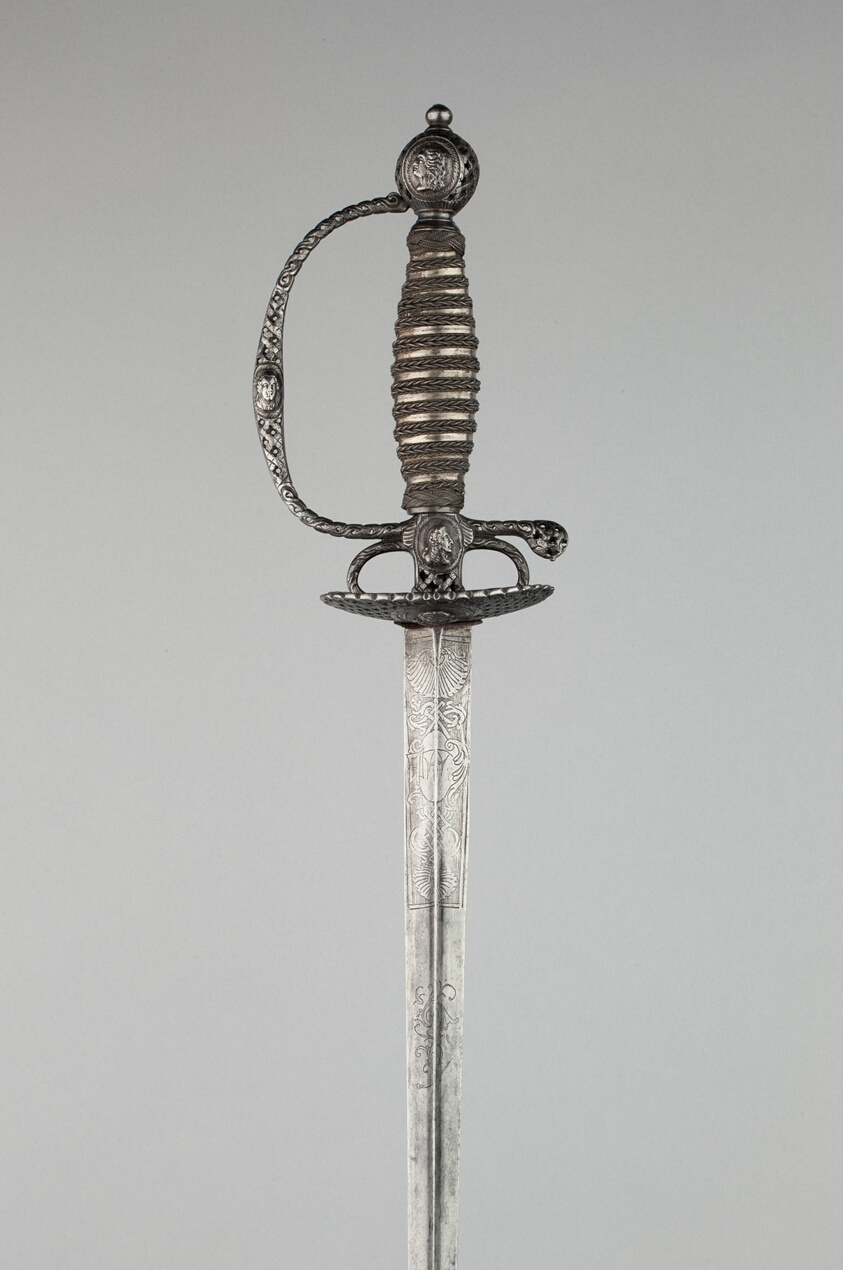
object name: Arms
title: Smallsword with Portraits of Monarchs from the Bourbon Dynasty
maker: French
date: c. 1770/80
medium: Iron, steel, silver, and wood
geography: France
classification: edged weapon-sword; arms; arms and armor